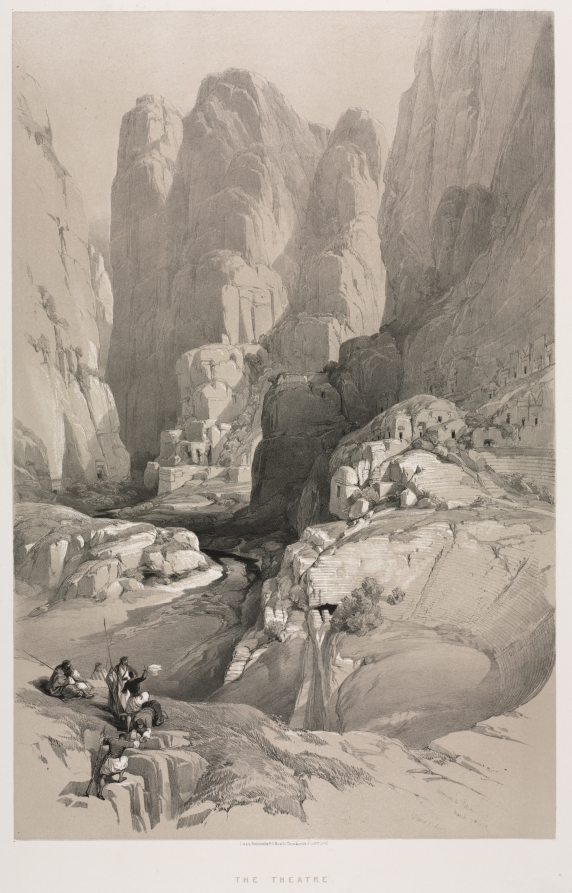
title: The Holy Land, Syria, Idumea, Arabia, Egypt & Nubia (Vol. III): Entrance to Petra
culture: England, 19th century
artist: Louis Haghe (British, 1806–1885)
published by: F. G. Moon (British, 1797–1871)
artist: after David Roberts (Scottish, 1796–1864)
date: 1842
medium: lithograph with black and beige tint stone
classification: Print